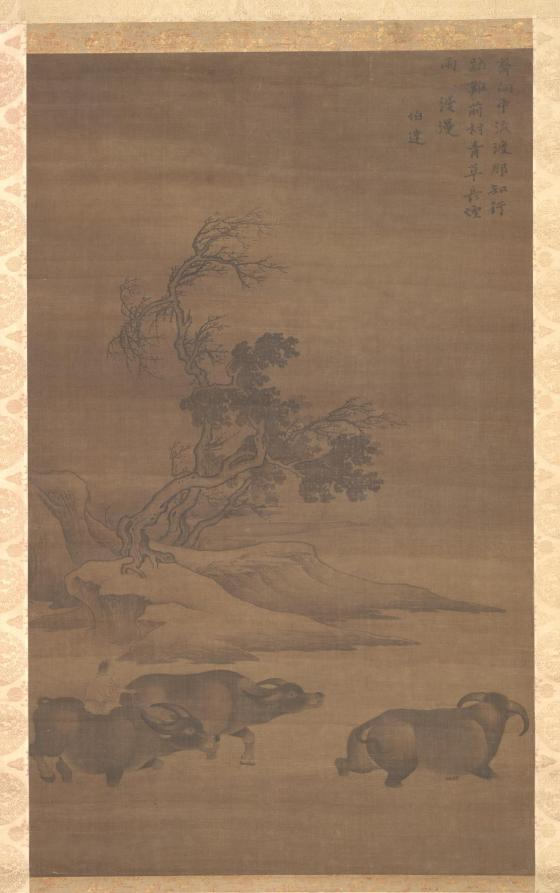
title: Herdboys and Buffalo in Landscape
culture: China, Qixian, Yuan dynasty (1271-1368)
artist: Guo Min (Chinese, mid-late 1200s)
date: 1200s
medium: Hanging scroll; ink on silk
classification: Painting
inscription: 齊向中流渡，那知行路難。/ 前村青草長，煙雨□漫漫。/ 伯達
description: Herdboys tend their buffalo in a bucolic landscape by a winding stream. Guo Min emphasizes the massive forms and mighty power of the animals, transforming them into forces of nature. The poem on this scroll reads: "Together, they wade through the middle of the stream, Mindless of perils in the journey. The grass grows tall in the village ahead, While the mist and rain spread far and wide."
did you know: Tending water buffalos has traditionally been the task of young boys and can still be seen in rural areas of Southern China today.